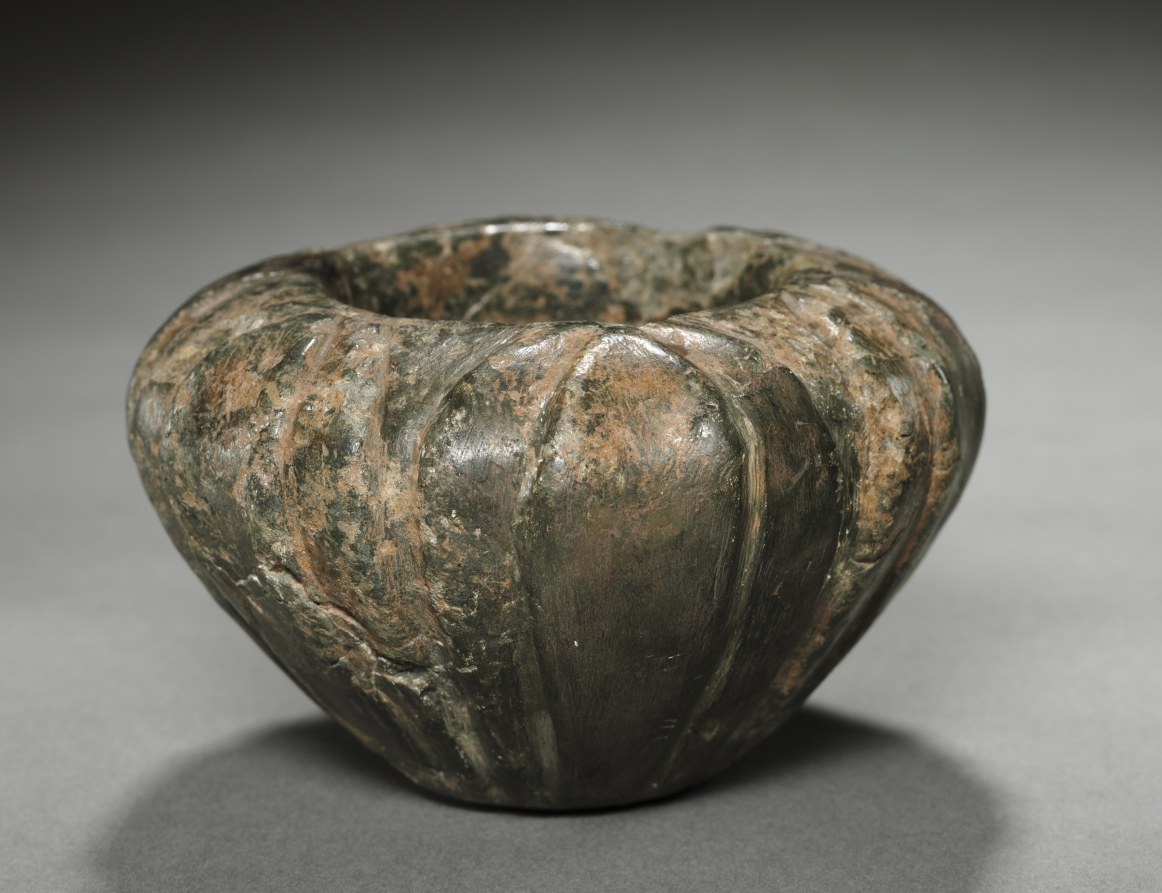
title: Minoan Petal Bowl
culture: Crete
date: 1600–1500 BCE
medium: stone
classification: Stone